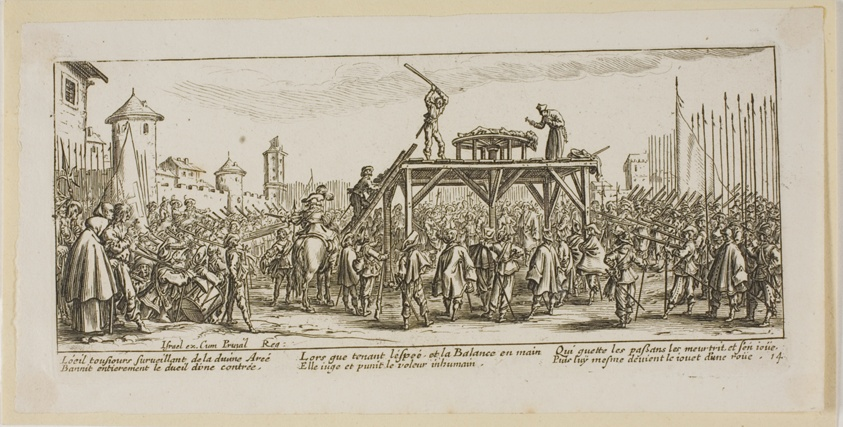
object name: Print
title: The Wheel, plate fourteen from The Large Miseries of War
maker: Gerrit Lucasz van Schagen (Dutch, born 1642); after Jacques Callot (French, 1592-1635)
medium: Etching on paper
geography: Netherlands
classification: etching; print; prints and drawing